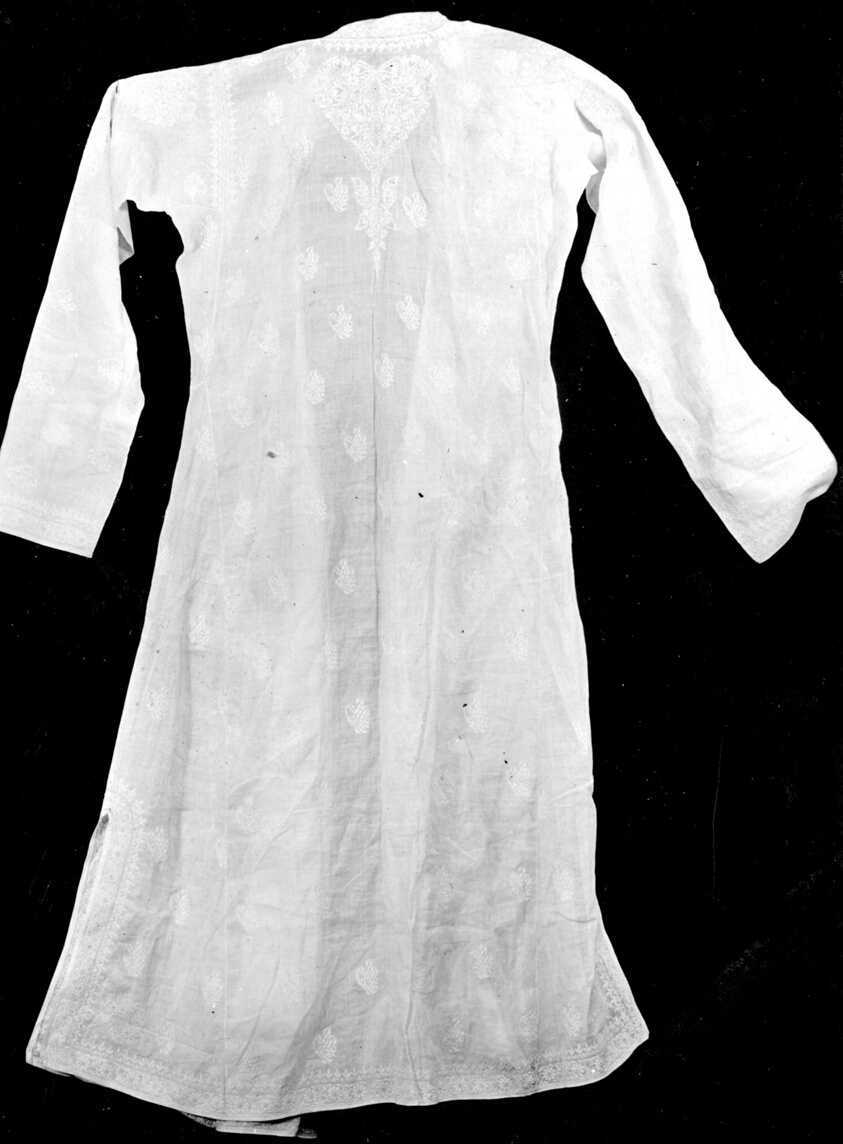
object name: Textile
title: Coat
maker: Eastern India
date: 19th century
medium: Embroidered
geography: India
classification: textile; costume; needlework (visual works); dress (garment); clothing